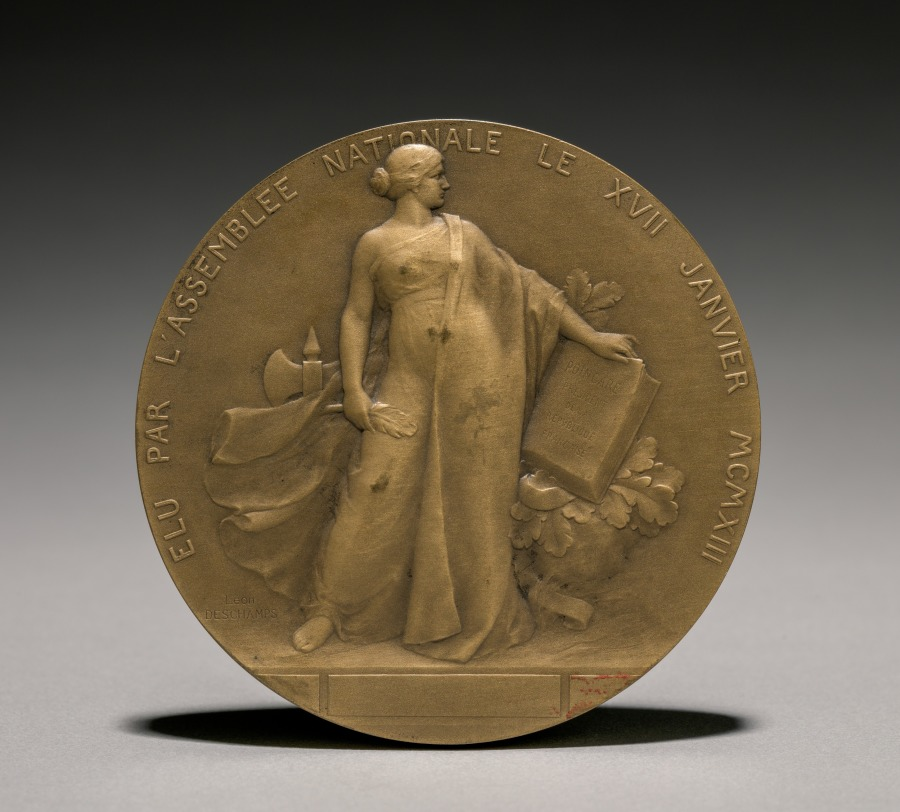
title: Poincarè Medal (reverse)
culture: France, 20th century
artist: Léon Julien Deschamps (French, 1860–1928)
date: 1900s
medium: bronze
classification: Metalwork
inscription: woman holding book on which is inscribed: "Poincarè President de la Republique Francaise"; above: "Elu par l'assemblee nationale le XVII Janvier MCMXIII."